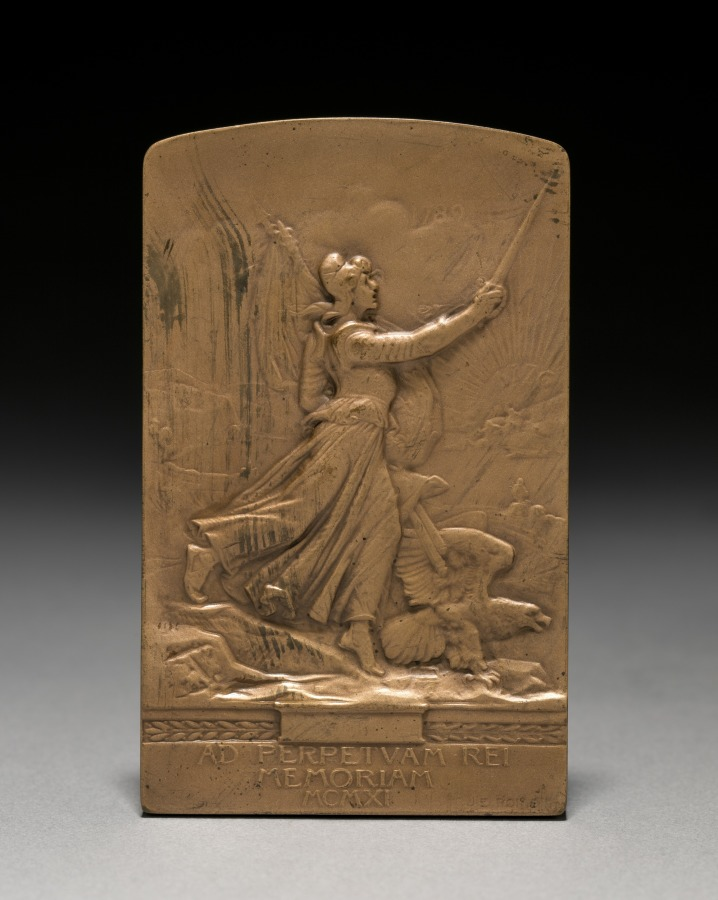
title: Medal: Lafayette (reverse)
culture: France, 20th century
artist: Jules Edouard Roiné (French, 1857–1916)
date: 1911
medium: bronze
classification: Metalwork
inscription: below: "AD PERPETVAM REI/MEMORIAM/MCMXI"; lower right-hand corner: "J.E. ROINE."